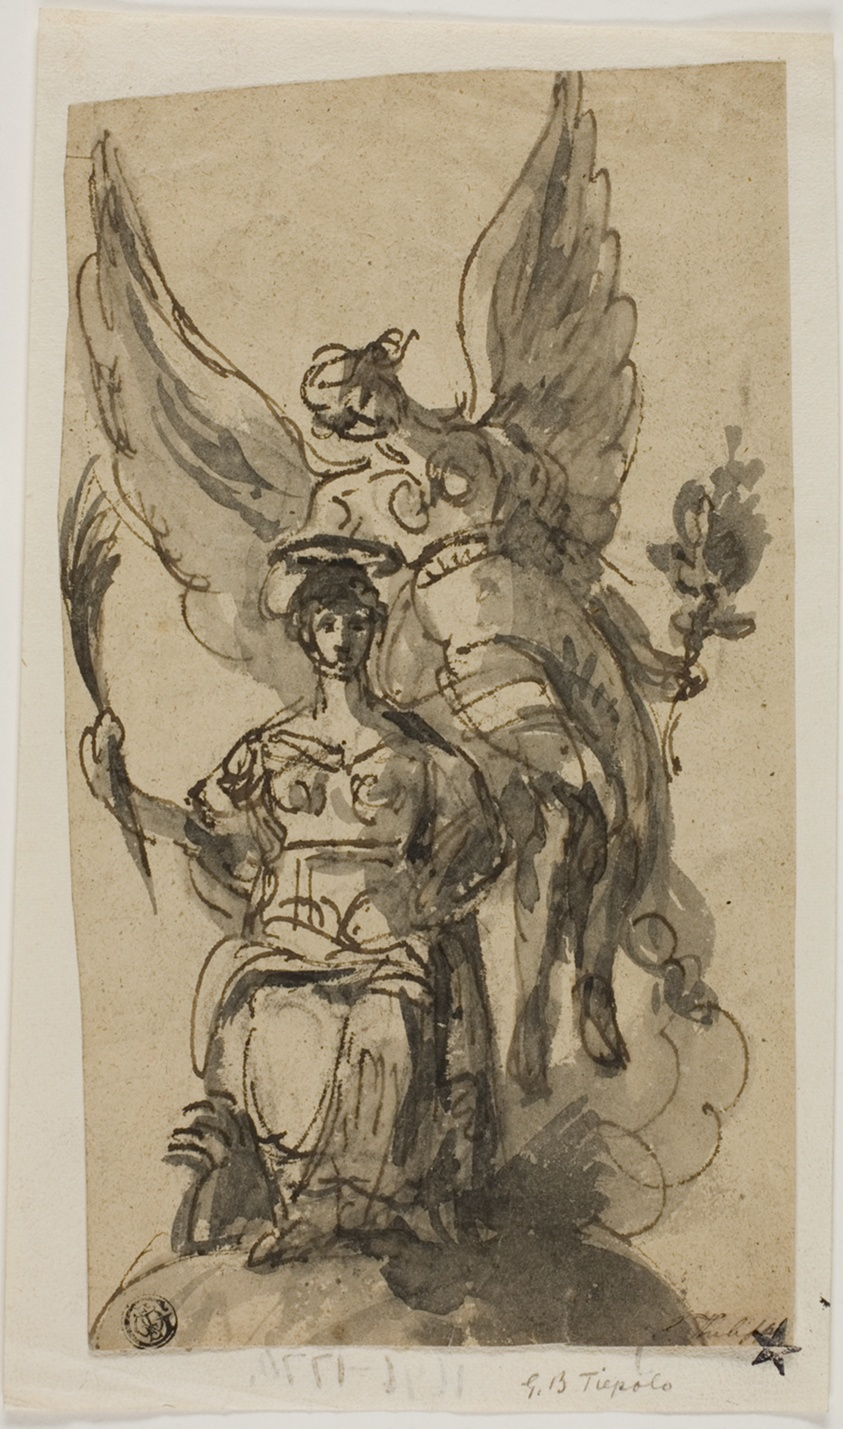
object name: Drawing and Watercolor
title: Seated Woman Crowned by Angel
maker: Attributed to Giovanni Battista Tiepolo (Italian, 1696-1770); or an unknown artist (Italian, 18th century)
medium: Pen and brown ink, with brush and gray wash, over traces of black chalk, on tan wove paper, laid down on ivory laid paper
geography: Italy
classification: pen and ink drawings; paper; drawings (visual works); prints and drawing